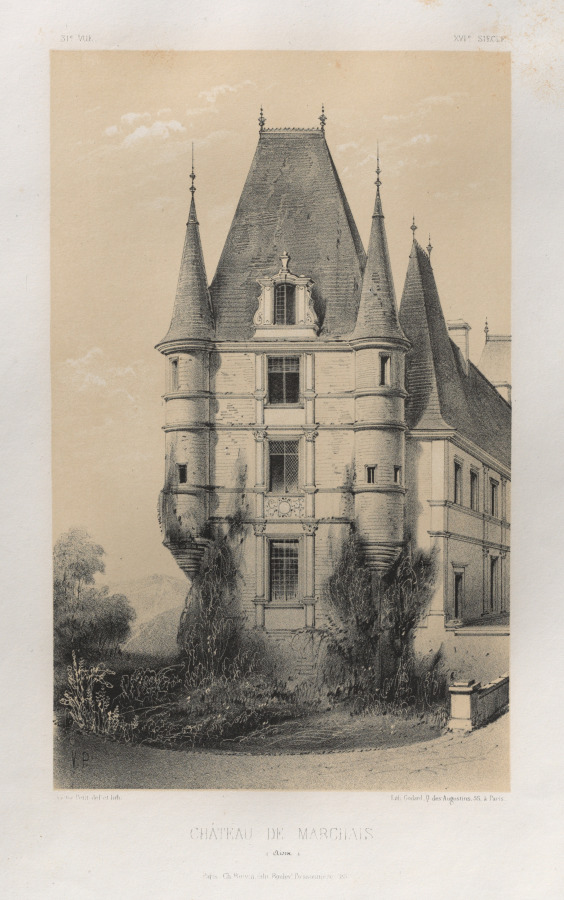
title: Architecture Pittoresque ou Monuments des xveme. Et xvieme. Siecles: Chateaux De France des XV et XVI Siecles: Pl. 31, Château De Marchais (Aisne)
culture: France, 19th century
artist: Victor Petit (French, 1817–1874)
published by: Charles Boivin (publisher and editor); Lith de Godard a Paris (printer)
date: 1860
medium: lithograph with tint stone, from portfolio of 100 lithographs with tint stone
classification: Print